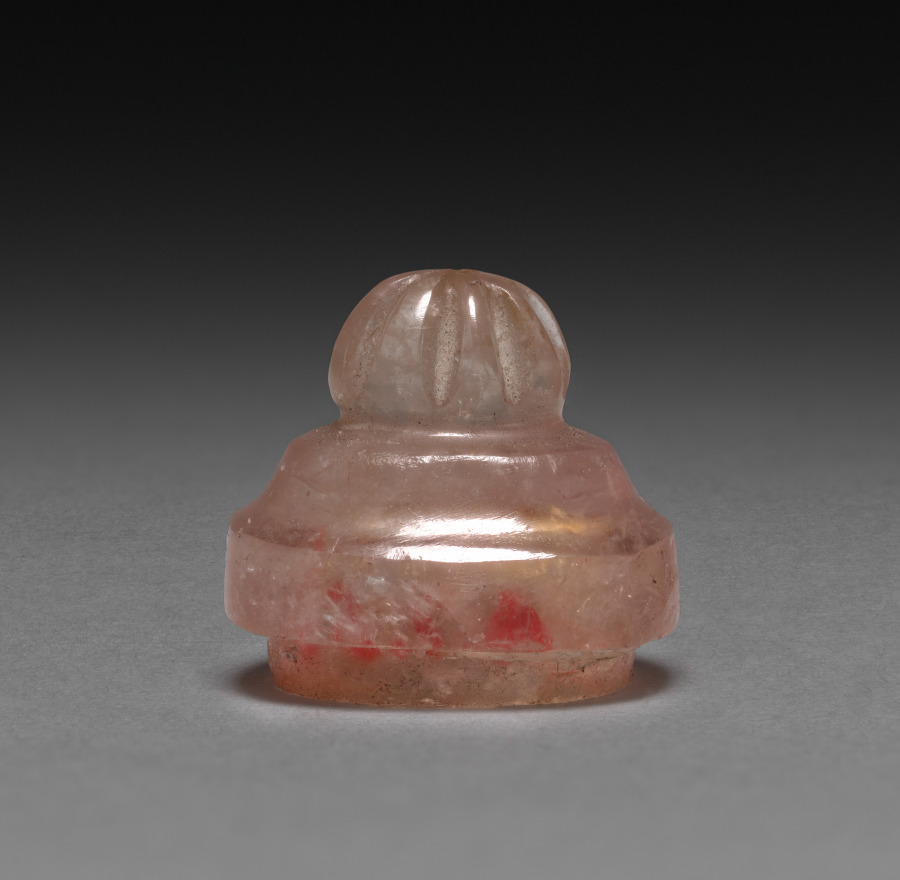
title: Miniature Jar (cover)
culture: China, Qing dynasty (1644-1911)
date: 19th-early 20th century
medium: jade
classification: Jade